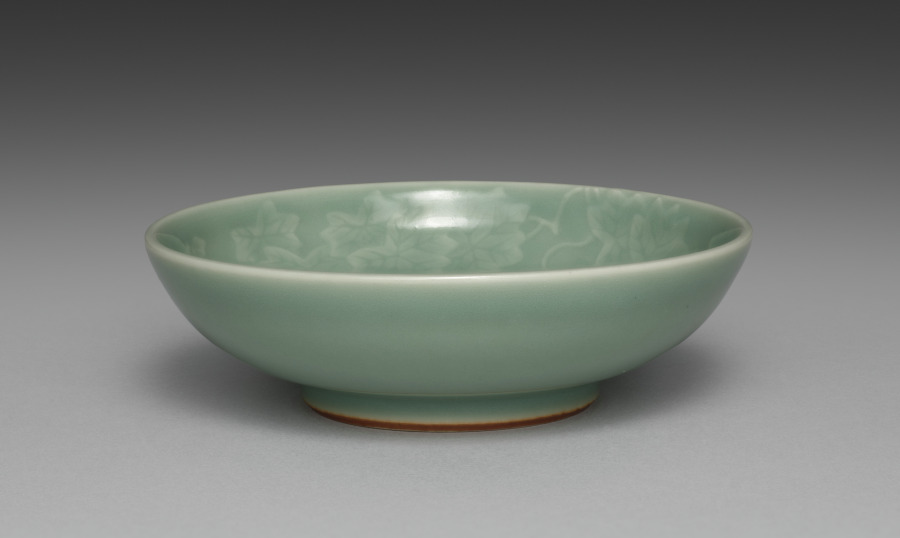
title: Dish from Dishes with Ivy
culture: Japan, Meiji period (1868–1912)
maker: Seifū Yohei III (Japanese, 1851–1914)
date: 1893–1914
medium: One from a set of five dishes; porcelain with green glaze and molded designs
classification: Ceramic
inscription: 清風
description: Yohei III’s main output for his sophisticated clientele was in the form of tea sets and dining sets. He often produced in pairs, sets of five, or sets of ten. This set of five dishes with a green glaze and designs of ivy vines in very low relief has unfortunately lost its box. These dishes are slightly larger than the other dishes, like CMA 2022.187, and so may have been not saucers but rather small plates for meals.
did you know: In his career, Seifū Yohei III created a range of dishes in green glazes.